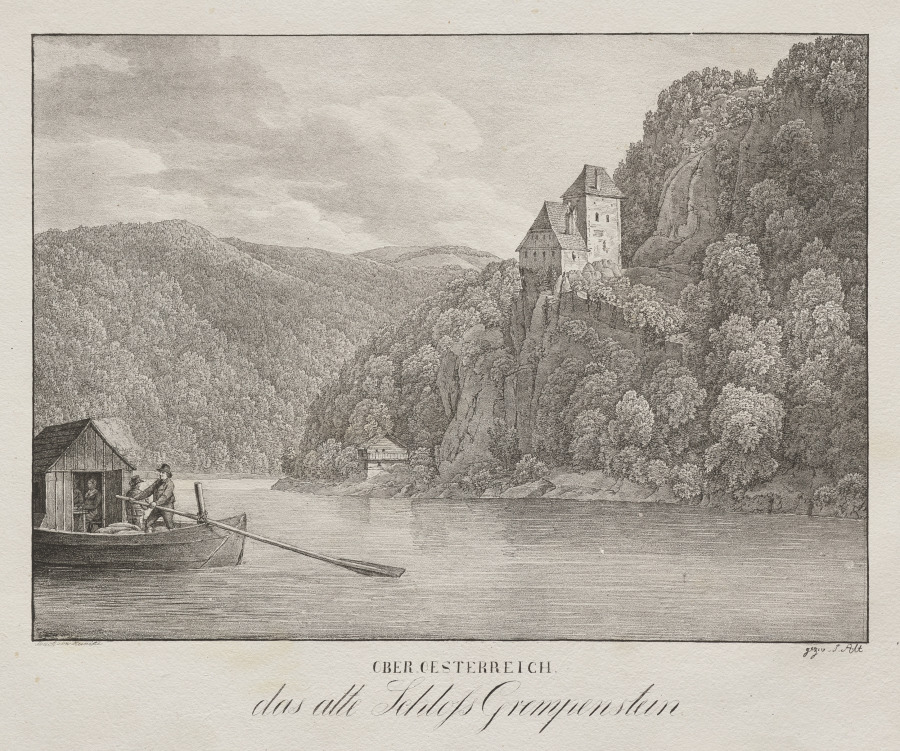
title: Nieder-oesterreich, Das Alte Schloss Grempenstein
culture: Austria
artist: Jakob Alt (Austrian, 1789–1872)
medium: lithograph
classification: Print